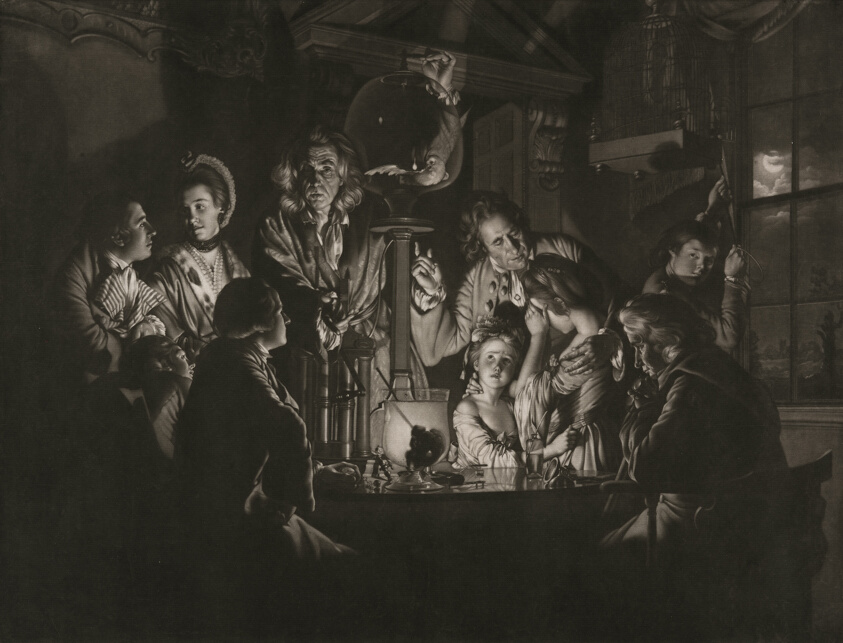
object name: Print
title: A Philosopher Shewing an Experiment on the Air Pump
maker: Valentine Green (English, 1739-1813); after Joseph Wright of Derby (English, 1734-1797); printed by John Boydell (English, 1719-1804)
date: 1769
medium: Mezzotint with traces of engraving in black on ivory laid paper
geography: England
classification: mezzotint; print; prints and drawing